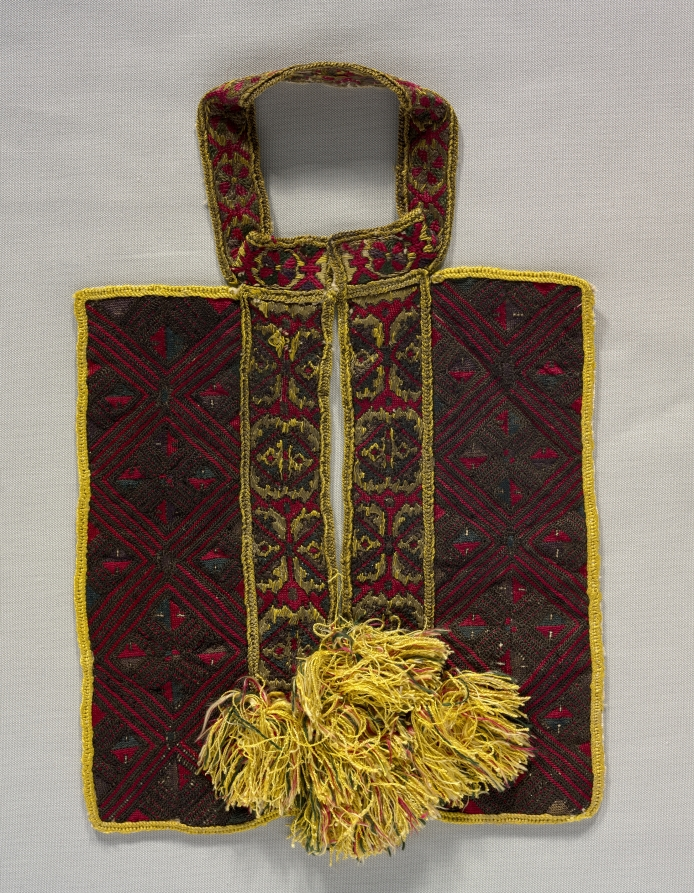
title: Blouse Front with Collar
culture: Dalmatia, 19th century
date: 19th century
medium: cottonand metal thread embroidery on linen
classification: Embroidery